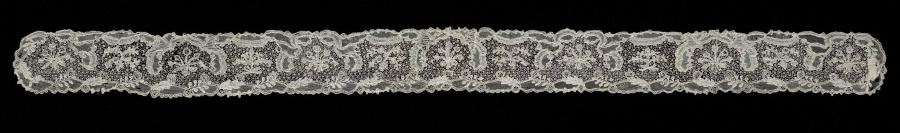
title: Lace Lappet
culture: France, Alençon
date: 1715–74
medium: Linen: needle lace (Point d'Alençon)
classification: Lace